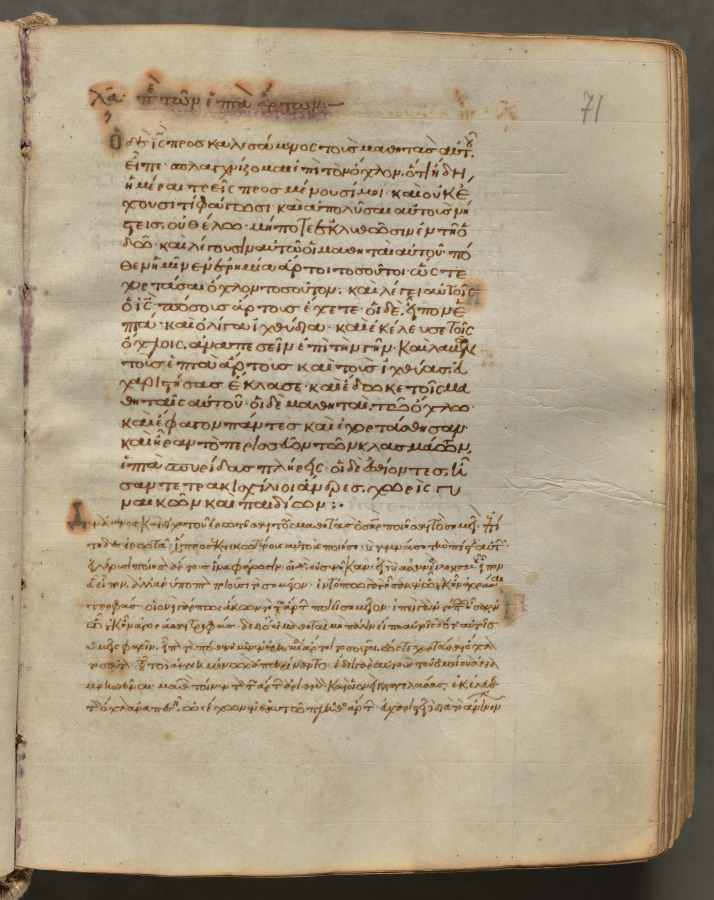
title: Text, folio 71 (recto), from a Gospel Book with Commentaries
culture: Byzantium, Constantinople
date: c. 1000–1100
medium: ink, tempera, and gold on vellum; leather binding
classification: Bound Volume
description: Each of the four gospels in this book opens on a page with brilliantly illuminated borders depicting the author of the text as well as birds-principally peacocks, symbols of the immortality of the soul-and fountains, representing the fountain of life and the salvation of the soul. This volume consists of 428 leaves with texts in Greek. Its level of sophistication suggests that it was probably written and decorated in a monastery in Constantinople.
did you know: Gospel Books were carried in procession through Byzantine churches.